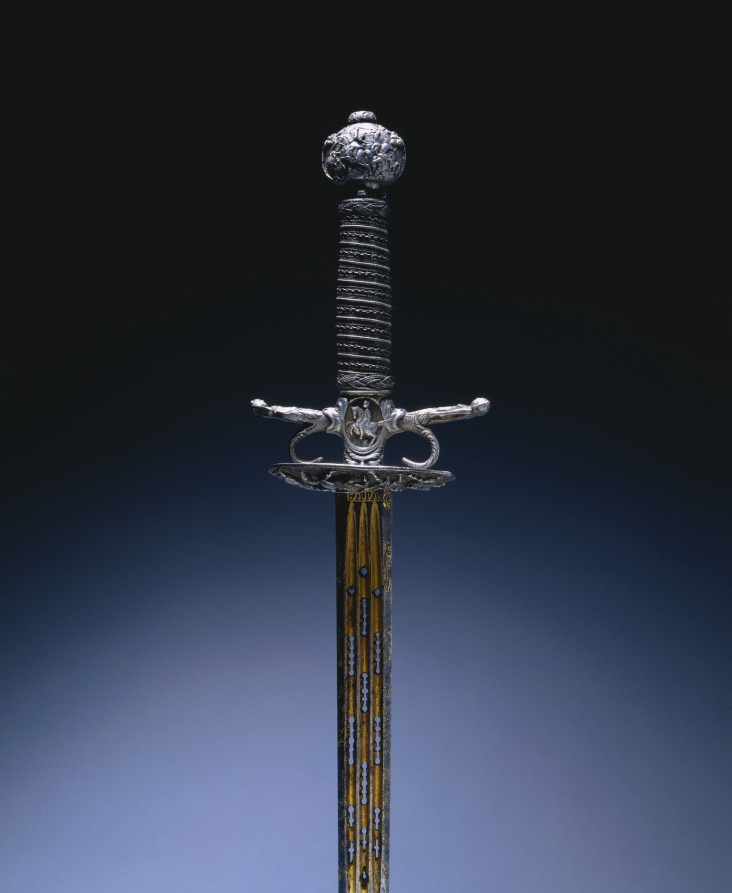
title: Small Sword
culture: hilt: Holland; blade: Spain, 17th century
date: c. 1650–60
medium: Blued, gilded, and pierced steel, wood, steel wire, chiseled shell guard, engraved blade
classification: Arms and Armor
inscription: inscribed on ricasso: VIVA RE DI NAPOLI